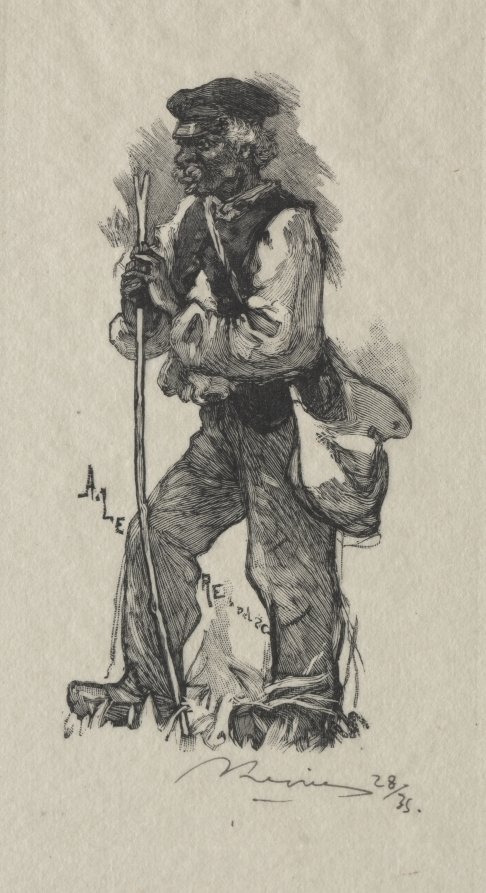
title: Le preneur de serpents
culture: France, 19th century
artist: Auguste Louis Lepère (French, 1849–1918)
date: 1889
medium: wood engraving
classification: Print